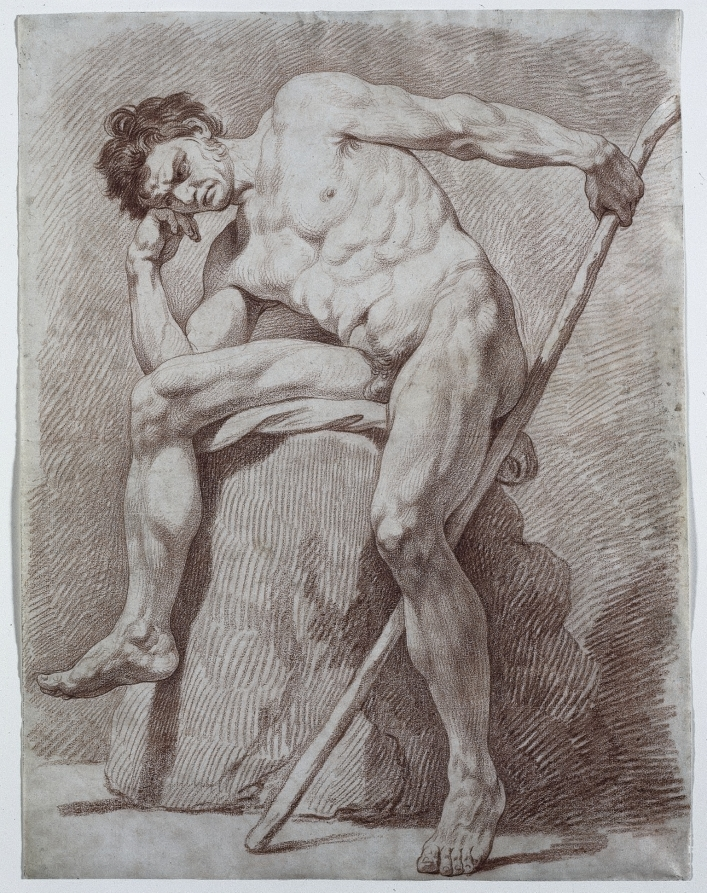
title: Academy of a Seated Nude Holding a Staff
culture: France, 18th century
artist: Edmé Bouchardon (French, 1698–1762)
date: c. 1735/50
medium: red chalk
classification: Drawing